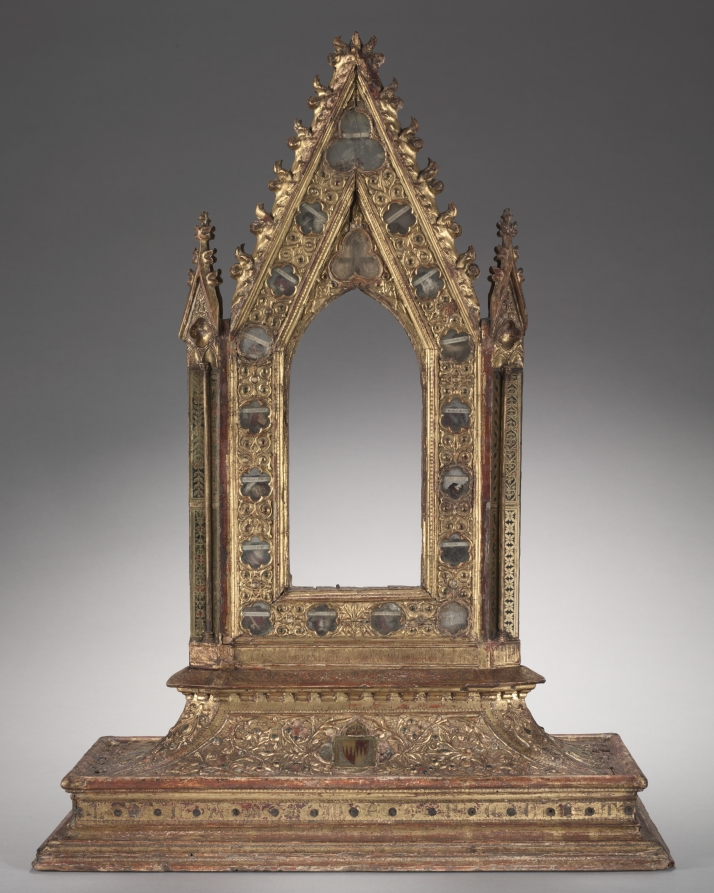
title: Frame for a Portable Reliquary Icon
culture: Italy, Siena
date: 1347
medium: gilded wood, modeled gesso, verre églomisé, glass cabochons, and relics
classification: Glass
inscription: an inscription with a stipled background runs around the lowest edge of the upright part of the frame: obverse: HOC/OPUS : FACTUM . FUIT . SUB . ANNO . DO/MINI; reverse: [small loss] /CCC . XLVII . TEMPORE . DOMINI . MINI/CINI. [This/work : has . been . made . under . year . of . the . Lord [small loss] /300 47 . in . the . time . of the Lord . Mini/Cini.] Another inscription appears on the obverse and reverse of the base: LUCAS ME FECIT. [Luke has made me.]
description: In the Middle Ages relics were thought to possess extraordinary power and were enshrined in lavish vessels called reliquaries. This complex frame once contained a painted image on each side, believed to be the Madonna and the Crucifixion, both long since lost. These images were surrounded by 17 carefully labeled relics, still visible. Intentionally portable, such votive objects could be easily carried from room to room or building to building as needed. A Latin inscription around the base reads: This work has been made under the year of the Lord CCCXLVII [1347] in the time of the Lord Mini/Cini. The inscription likely refers to Mino Cinughi, rector of the Hospital of Santa Maria della Scala in Siena, 1340-51. The Cinughi coat of arms as well as those of the hospital appear on the base. Another inscription, LUCAS ME FECIT (Luke made me), appears on both sides of the base. While this object probably resided on an altar in the hospital, the fact that it has two sides suggests it was carried aloft in processions.